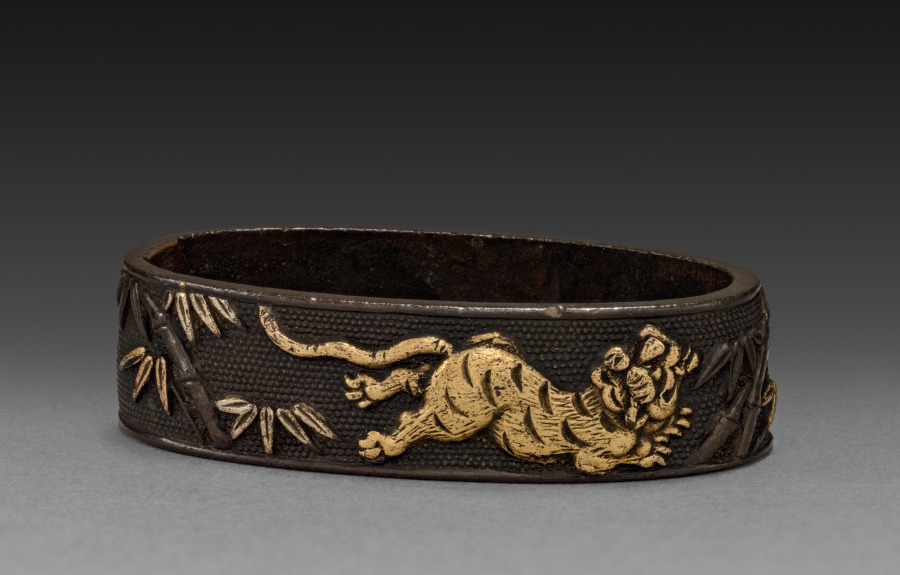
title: Sword-Hilt Collar (Fuchi) with Tiger in Bamboo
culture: Japan, Edo period (1615–1868)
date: 1700–1850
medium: shakudo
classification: Arms and Armor